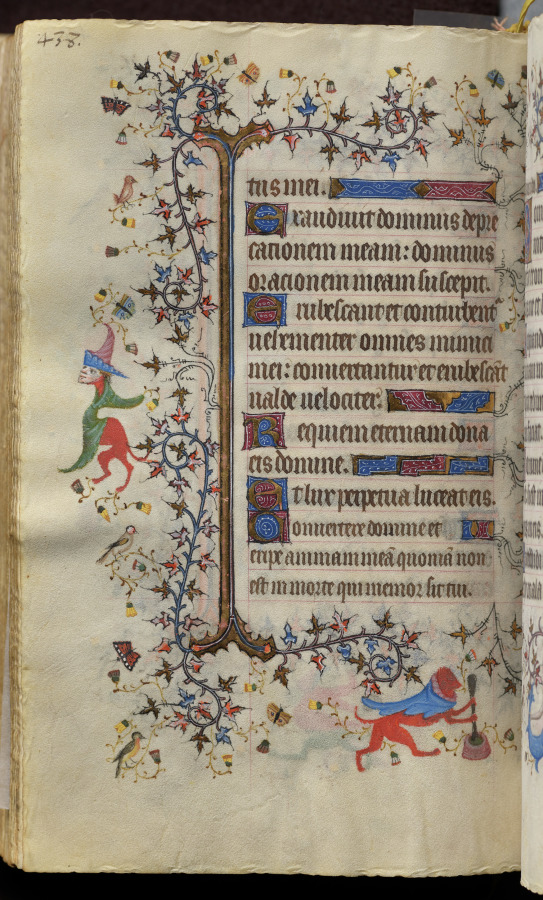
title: Hours of Charles the Noble, King of Navarre (1361-1425): fol. 213v, Text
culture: France, Paris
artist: Master of the Brussels Initials and Associates (French)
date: c. 1405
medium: ink, tempera, and gold on vellum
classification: Bound Volume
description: This precious volume was obviously highly prized by its owner, the French-born King of Navarre, who had his coat of arms painted on no less than twenty folios. Rather than directly commissioning this manuscript from a specific workshop, it seems that Charles the Noble acquired his book of hours -- perhaps ready-made for the luxury market -- while on a trip to Paris in 1404-05. A collaborative effort, six painting styles are evidenced within the pages of this codex, those of two Italians, two Frenchmen, and two Netherlanders. The painter who was responsible for the planning and decoration of the book, and who produced seventeen of the large miniatures, was a Bolognese artist known as the Master of the Brussels Initials. His principal assistant, responsible for most of the borders, was a Florentine who signed his name "Zecho" da Firenze on folio 208 verso.